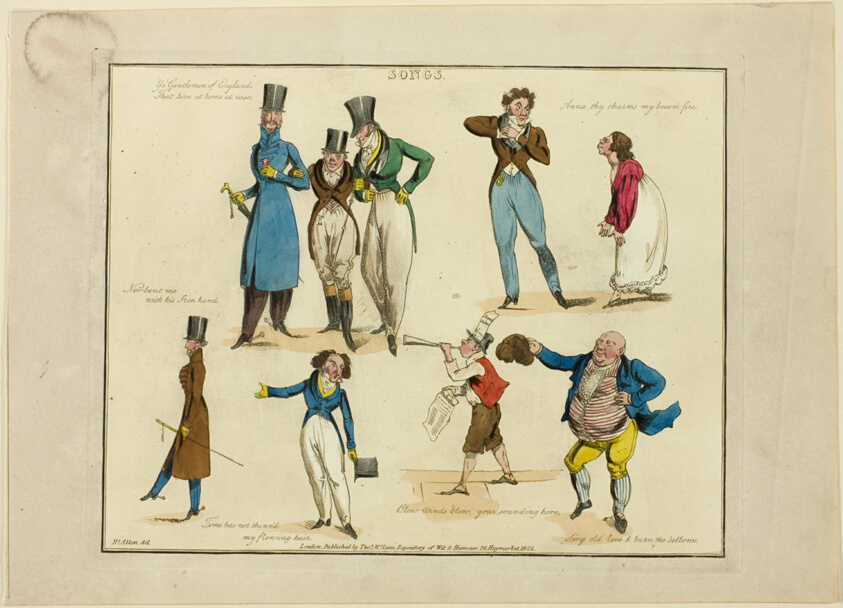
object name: Print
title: Plate from Illustrations to Popular Songs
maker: Henry Alken (English, 1785-1851); published by Thomas McLean (English, active 1790-1860)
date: 1822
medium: Soft ground etching with hand-coloring and aquatint on paper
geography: England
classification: etching; print; prints and drawing